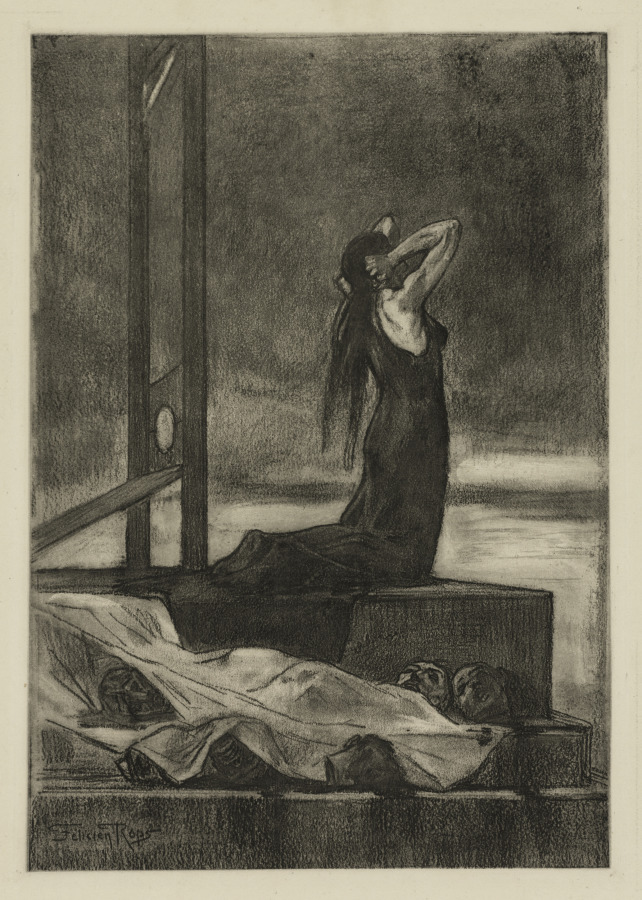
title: Capital Punishment: The Pain of Death (Todesstrafe: La peine de mort)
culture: Belgium, 19th century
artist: Félicien Rops (Belgian, 1833–1898)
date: c. 1880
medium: softground etching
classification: Print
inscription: Lower right corner, in graphite: La peine de mort, 125.4; $300